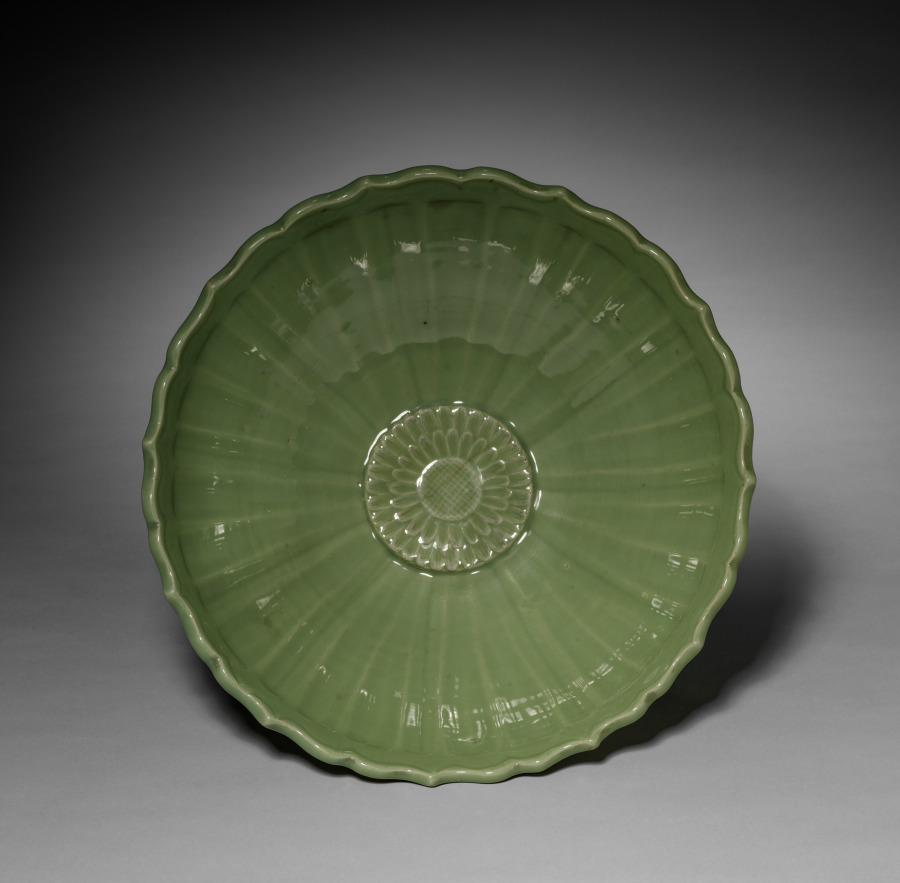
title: Large Bowl with Molded Decoration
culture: China, Zhejiang province, Longquan kilns, Ming dynasty (1368-1644)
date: 1300s–1400s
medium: Porcelaneous stoneware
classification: Ceramic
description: The lobed sides of this bowl open like a flower and rise to a solidly molded and pointed rim reminiscent of metalware. The bowl with a thick, shiny, jadelike green glaze was made by potters who mastered techniques to fire vessels of enormous sizes for the export market. Large bowls and plates were primarily shipped to the Middle East where they were used for banquets, in which food was traditionally offered in the center of a seated gathering.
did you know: Longquan celadon, or greenware, was often fired in dragon kilns, a type of narrow, sloped brick tunnel that could fire up to 25,000 pieces at a time.